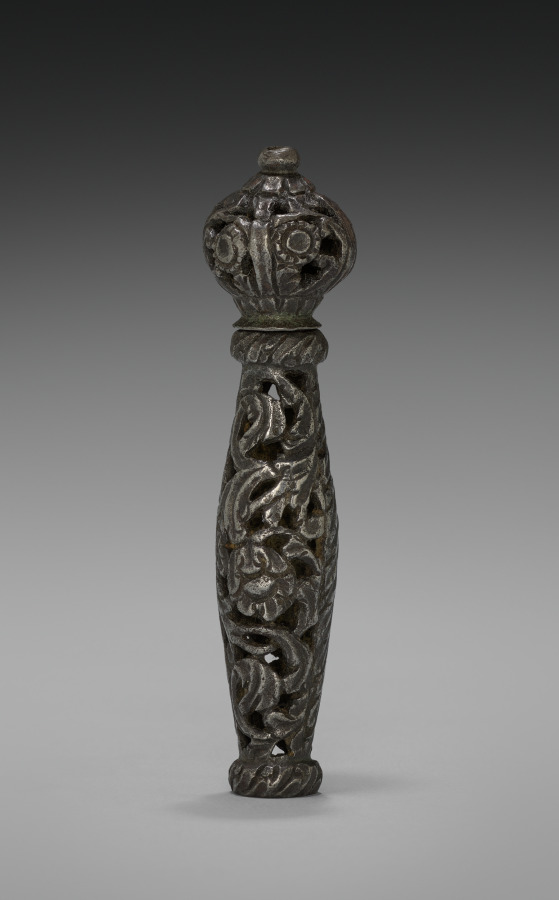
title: Pommel and Grip of Dress Sword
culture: Italy, 17th century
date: 1600s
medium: steel, chiseled, chased, and pierced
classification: Arms and Armor